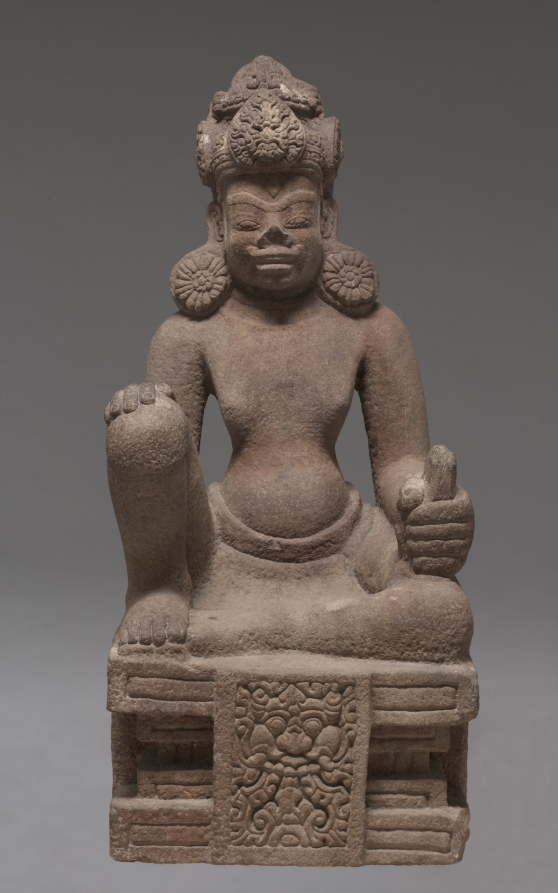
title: Enthroned planetary deity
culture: Central Vietnam (Champa), Quang Nam province, Dong Duong monastery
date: 850–75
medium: Sandstone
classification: Sculpture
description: Enthroned Planetary Deity is a powerful presence about three feet tall, made of a light-colored sandstone. He is a personification of one of the nine planets that protected a Buddhist temple; the short dagger in his left hand along with the mustache and stylized furrowed brow refer to his role as a fierce protector. His posture is that of royal ease, and his crown, massive earrings, and throne also mark him as a king of the heavens. The mark on his forehead refers to his association with enlightened beings. The meaning of a planetary deity as a guardian pertains to the consecration of the temple at a time when the planets were correctly aligned with the stars, so that the site and devotees will be protected from misfortune. The “face of glory” (kirtimukha) on the carved relief panel in front of his pedestal is an image pertaining to the creative energy (shakti) that is emitted from the temple itself; it spits jewels and vegetal motifs that connote abundance and prosperity that will accrue to the worshipers who come to the temple. This sculpture is one of the rare surviving examples from the Cham culture of central and southern Vietnam. It is documented to have come from the Dong Duong monastery, dedicated to Mahayana Buddhism.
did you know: Sanskrit dedicatory inscriptions show that the temple and monastery complex at Dong Duong founded in 875.